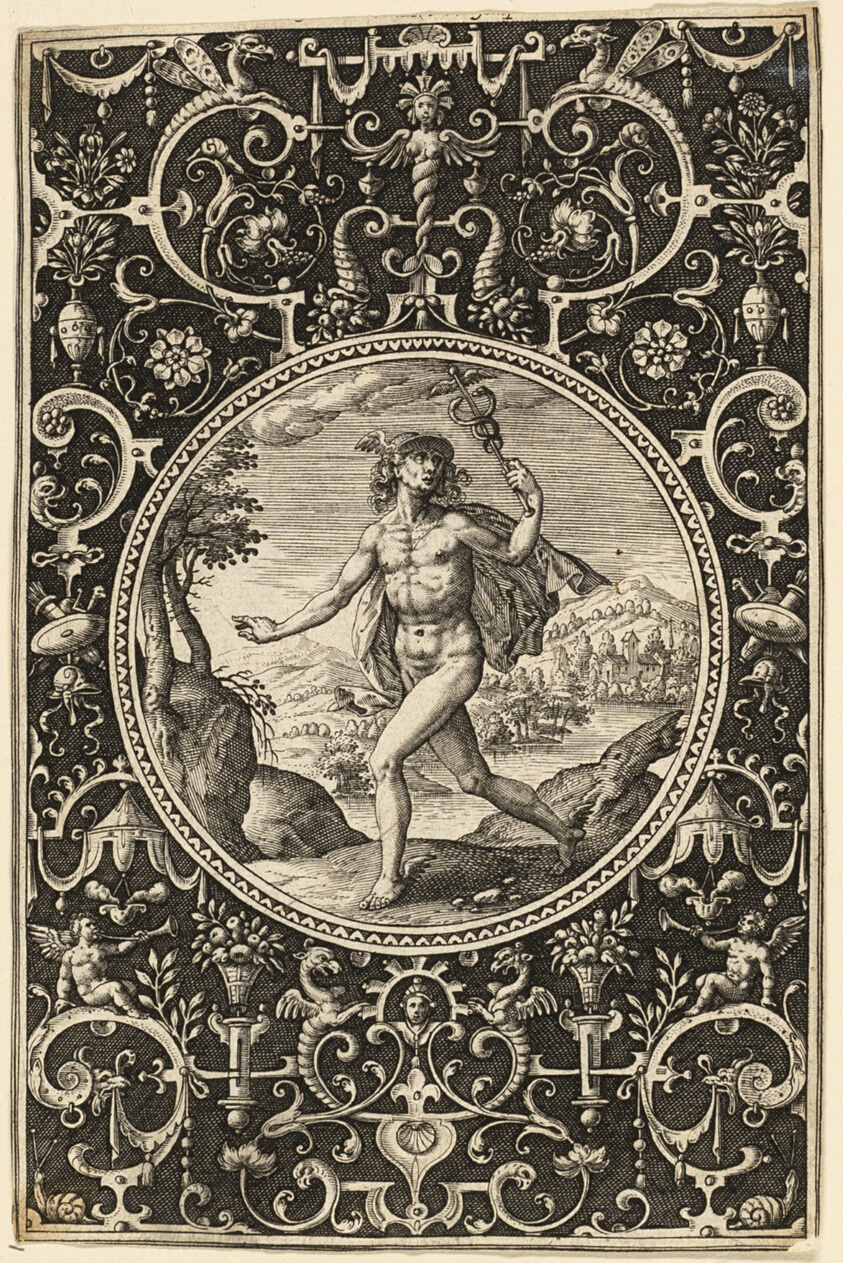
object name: Print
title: Mercury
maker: Adriaen Collaert, II; Flemish, 1560-1618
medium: Engraving on paper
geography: Flanders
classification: engraving; print; prints and drawing